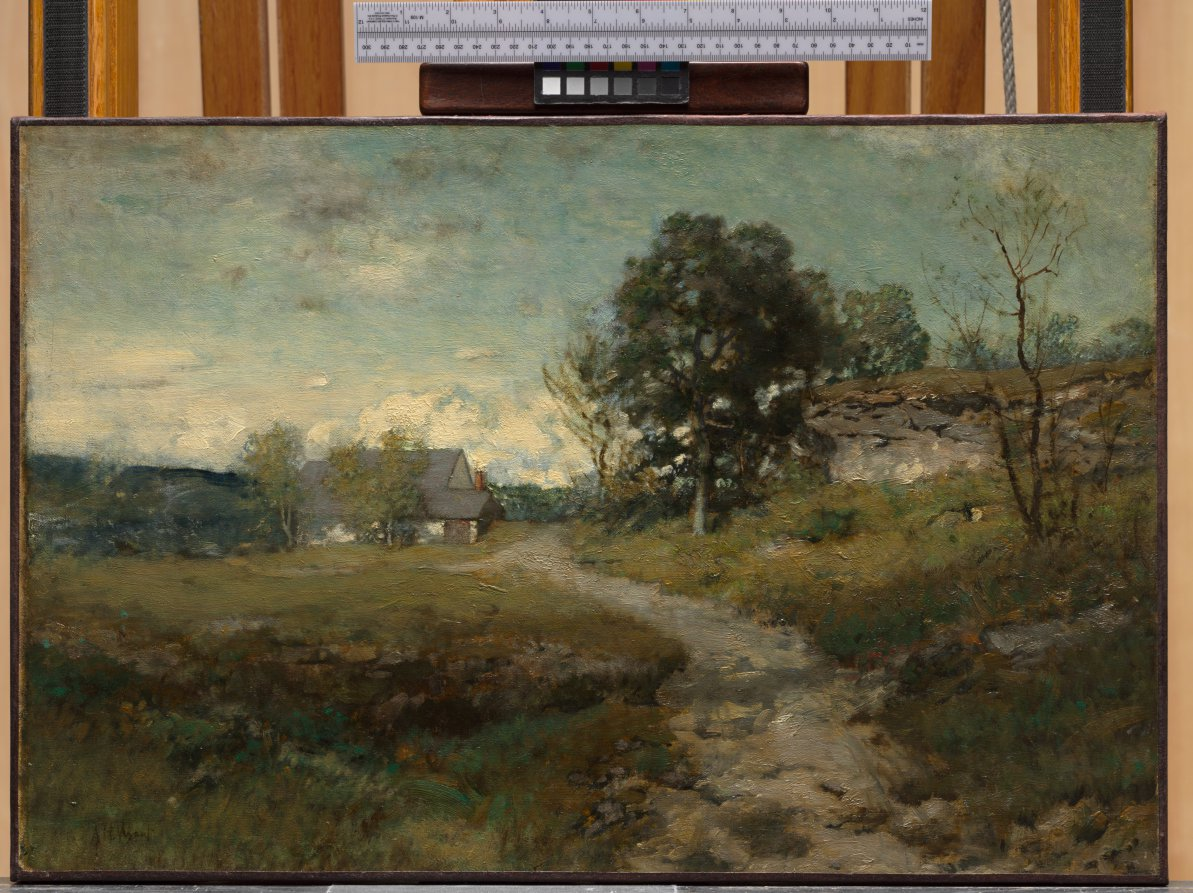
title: Arkville Landscape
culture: America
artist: Alexander H. Wyant (American, 1836–1892)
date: 1880s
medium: oil on canvas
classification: Painting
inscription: Signed lower left: "A.H. Wyant"